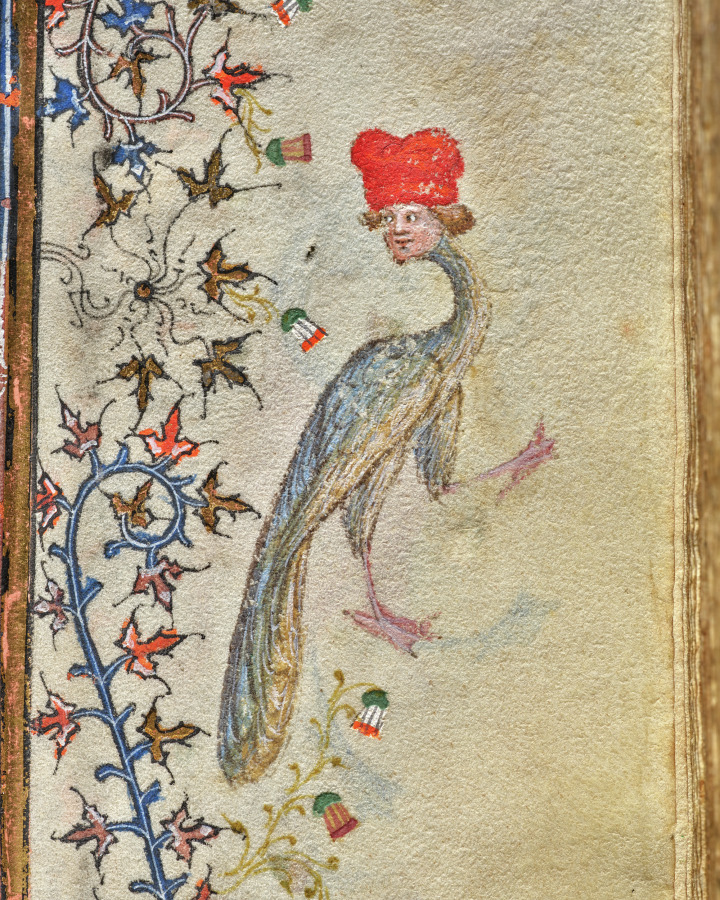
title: Hours of Charles the Noble, King of Navarre (1361-1425): fol. 18r, Text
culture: France, Paris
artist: Master of the Brussels Initials and Associates (French)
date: c. 1405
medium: ink, tempera, and gold on vellum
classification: Bound Volume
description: This precious volume was obviously highly prized by its owner, the French-born King of Navarre, who had his coat of arms painted on no less than twenty folios. Rather than directly commissioning this manuscript from a specific workshop, it seems that Charles the Noble acquired his book of hours -- perhaps ready-made for the luxury market -- while on a trip to Paris in 1404-05. A collaborative effort, six painting styles are evidenced within the pages of this codex, those of two Italians, two Frenchmen, and two Netherlanders. The painter who was responsible for the planning and decoration of the book, and who produced seventeen of the large miniatures, was a Bolognese artist known as the Master of the Brussels Initials. His principal assistant, responsible for most of the borders, was a Florentine who signed his name "Zecho" da Firenze on folio 208 verso.